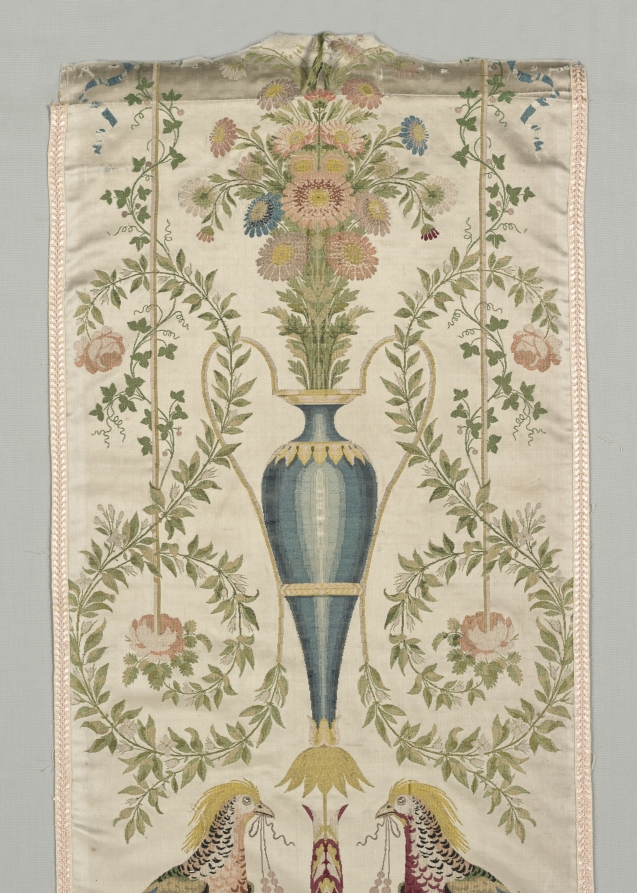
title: Wall Covering, "The Pheasants" from the "Vatican Verdures" Series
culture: France, 18th century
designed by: Jean-Démosthène Dugourc (French, 1749–1825)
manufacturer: Camille Pernon & Cie (French)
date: after 1799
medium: lampas (satin weave and plain weave variant), brocaded, embroidered (chain, satin stitches); silk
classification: Textile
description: France developed a thriving silk industry in Lyon with the goal of becoming the fashion center of Europe. Employment soared to some 20,000 workers by the time of the French Revolution in 1789. Designs changed annually, colors established new fashions, and spectacular silks were produced during the late 1700s. Dugourc, an architect who studied in Italy, became a renowned textile designer for Camille Pernon & Cie, purveyors to King Louis XVI (reigned 1774–92). He created this elaborate, balanced composition as part of elegant wall coverings for the Casita del Labrador, near Madrid. Dugourc named the series after frescos by Raphael in the Vatican.